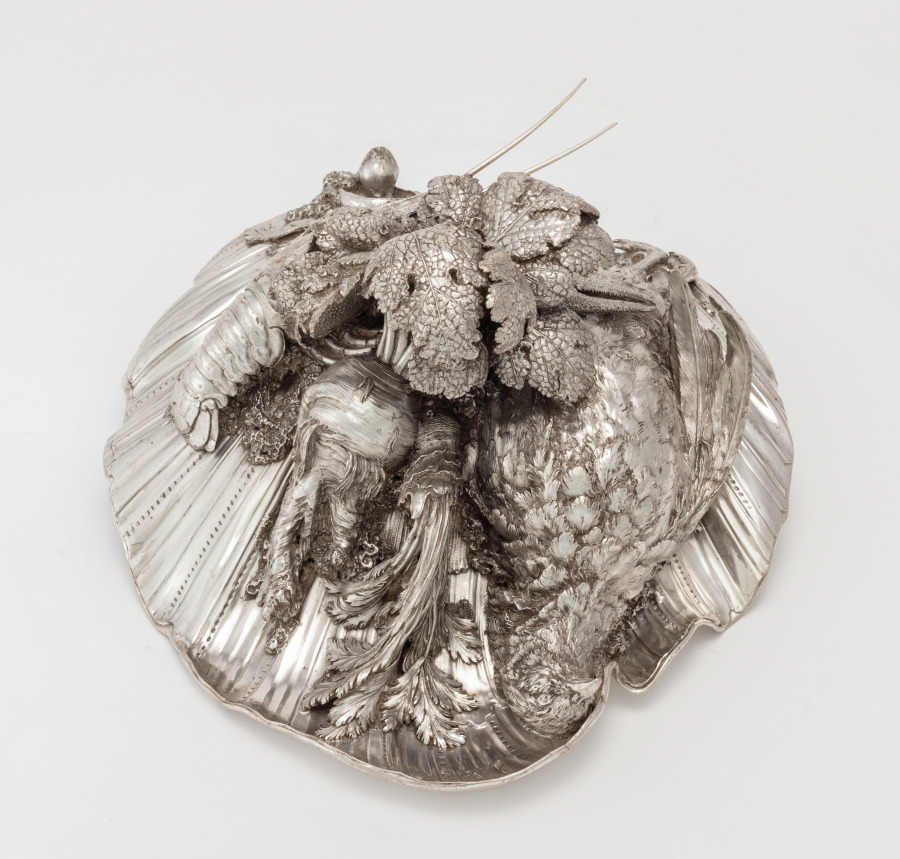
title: Cover for a Tureen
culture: France, Paris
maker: Henry Adnet (French, 1745)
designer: Juste-Aurèle Meissonnier (French, 1695–1750)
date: 1735–38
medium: silver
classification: Silver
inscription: engraved Meissonnier signature.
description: See entry for cover record 1977.182.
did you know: The langoustine, pigeon, and vegetables were cast using real examples giving the silver copies lifelike detail and appearance.